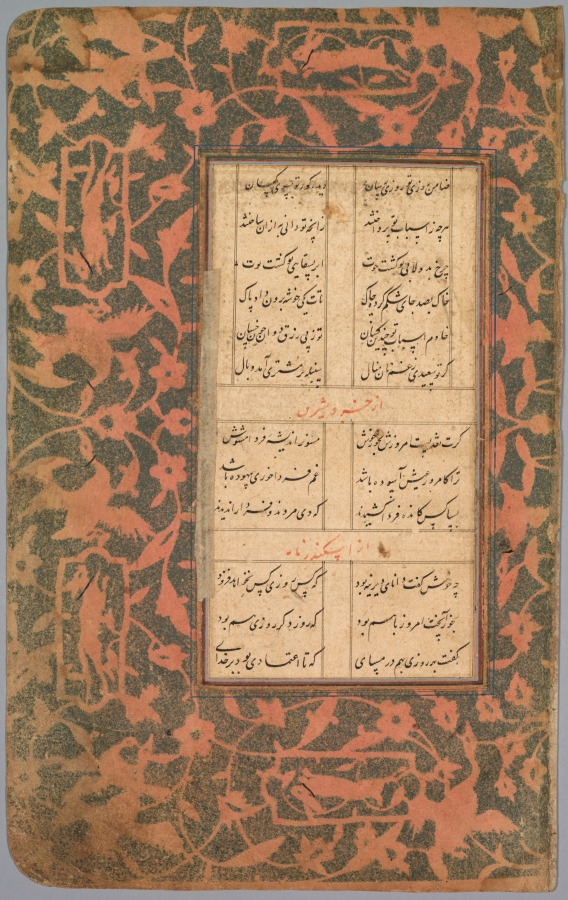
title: School Exercise Alphabet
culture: India, Mughal Dynasty (1526-1756)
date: 18th century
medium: ink on paper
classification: Manuscript